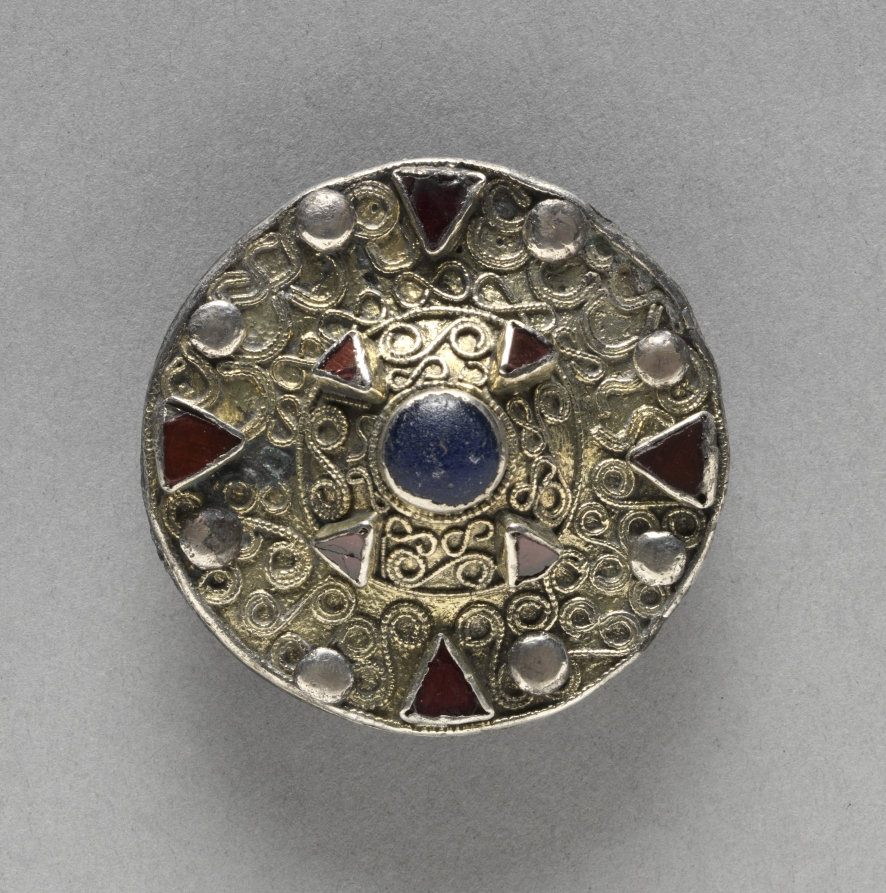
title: Filigree Disk Brooch with Central Boss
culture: Frankish, late Merovingian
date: late 600s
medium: gilt silver, copper alloy, glass, almandine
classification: Jewelry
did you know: This brooch is made out of gilt-silver, meaning silver that is covered by gold.